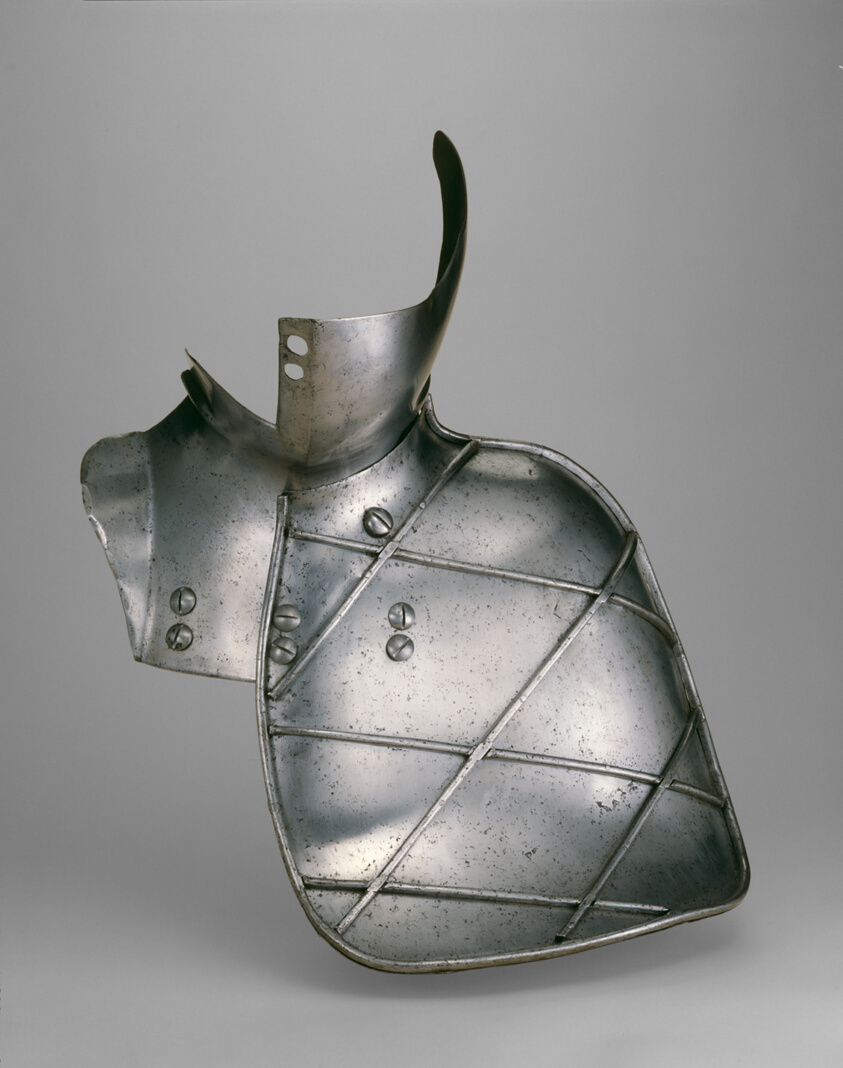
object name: Armor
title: Reinforcing Bevor and Grandguard for the Joust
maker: South German; Augsburg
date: c. 1560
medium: Steel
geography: Augsburg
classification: suit-element; armor; arms and armor